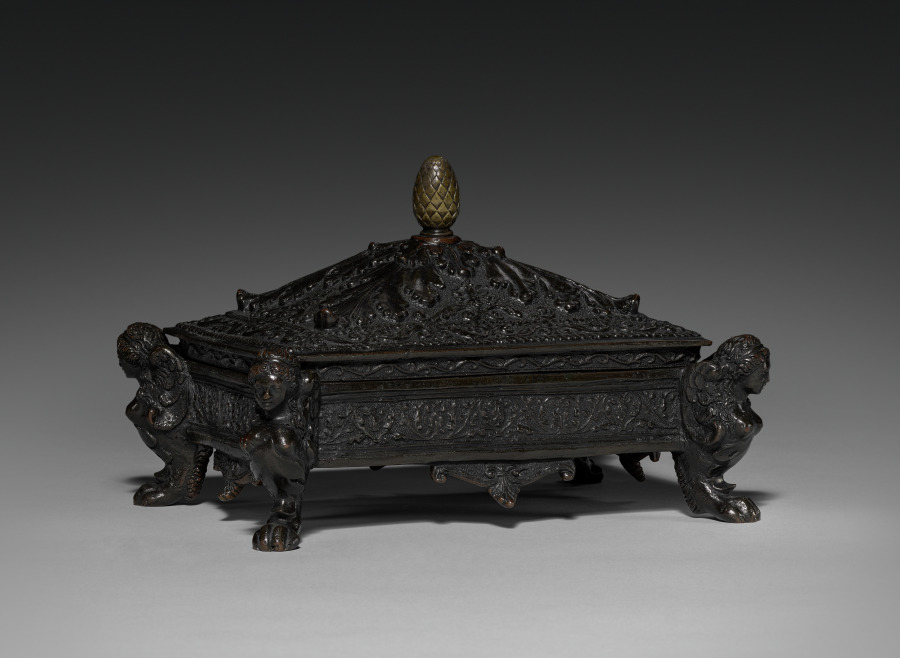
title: Writing Casket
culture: Italy, Ravenna, 16th century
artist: workshop of Severo da Ravenna (Italian, c.1496–c.1543)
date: c. 1525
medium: bronze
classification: Sculpture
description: The interior is divided into four compartments for storing writing implements and sand for blotting.